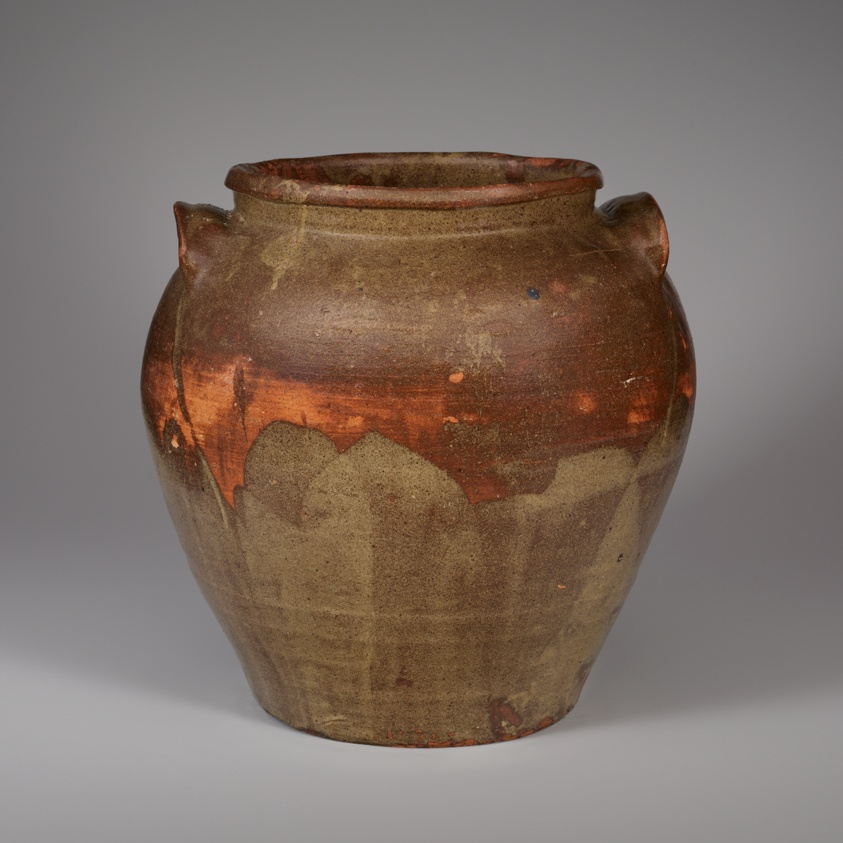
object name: Ceramics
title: Storage Jar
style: 19th century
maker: David Drake (American, c. 1801–1870s); Lewis Miles Stoney Bluff Manufactory [plantation] (American, c. 1840–70s); Edgefield, South Carolina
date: 1857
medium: Stoneware and glaze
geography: Edgefield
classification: container; american decorative arts; pottery; ceramics; stoneware; vessel; decorative arts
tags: storage